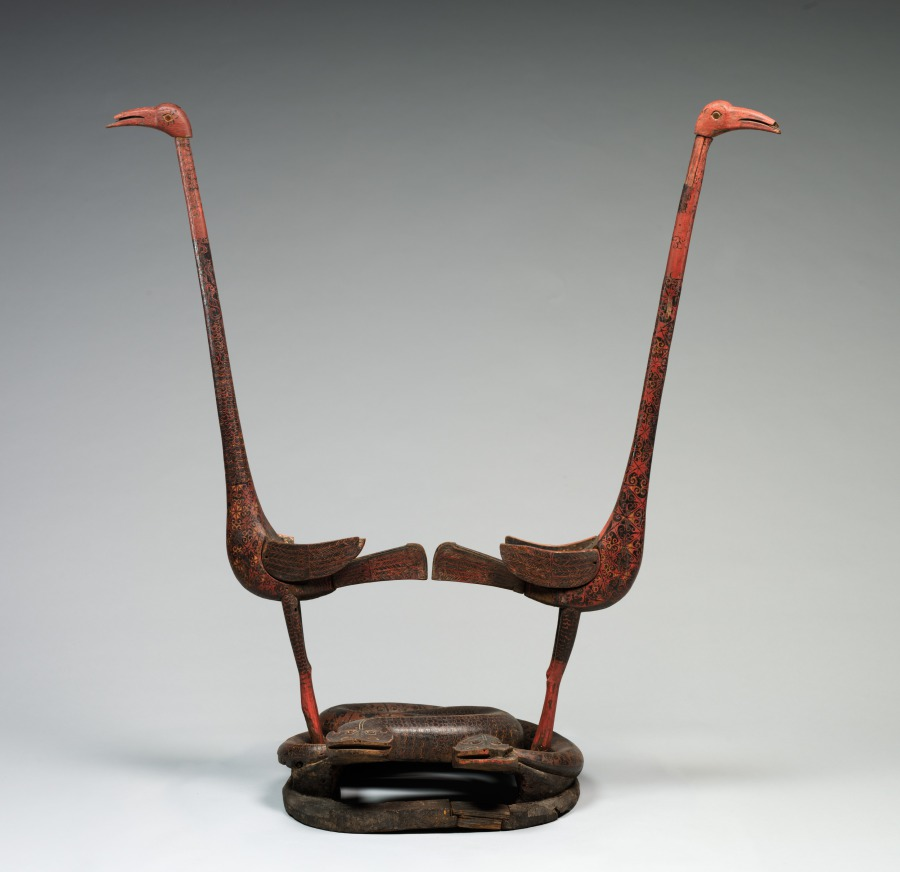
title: Cranes and Serpents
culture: China, reportedly from Hunan province, Changsha, Warring States period (475–221 BCE), State of Chu (c. 1046–223 BCE)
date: 475–221 BCE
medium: lacquered wood with polychromy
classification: Sculpture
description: A different style of ritual art developed in the state of Chu in South China. In addition to bronze vessels, lacquered wood artifacts expanded the repertory of ritual implements. This extraordinary sculpture was probably a drum stand for supporting a suspended drum in ritual ceremonies. It is unique among other excavated drum stands of the Chu, which typically show two birds standing on tigers. The theme of the bird stepping on the serpent was common in the Chu visual culture. Yet the slender proportions and seemingly flimsy structure of this particular set raise the question of whether it was utilitarian or mostly served symbolic functions in the tomb. The birds' and serpents' bodies have designs painted in red lacquer and yellow pigment against the black lacquer. Scientific analyses confirm the additional use of a blue or green pigment that has been discolored over time.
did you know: The cranes' long necks allowed a lightweight drum to be suspended from strings through the beaks, while the densely intertwined snakes provided a weighty base to stabilize the object during musical performances.